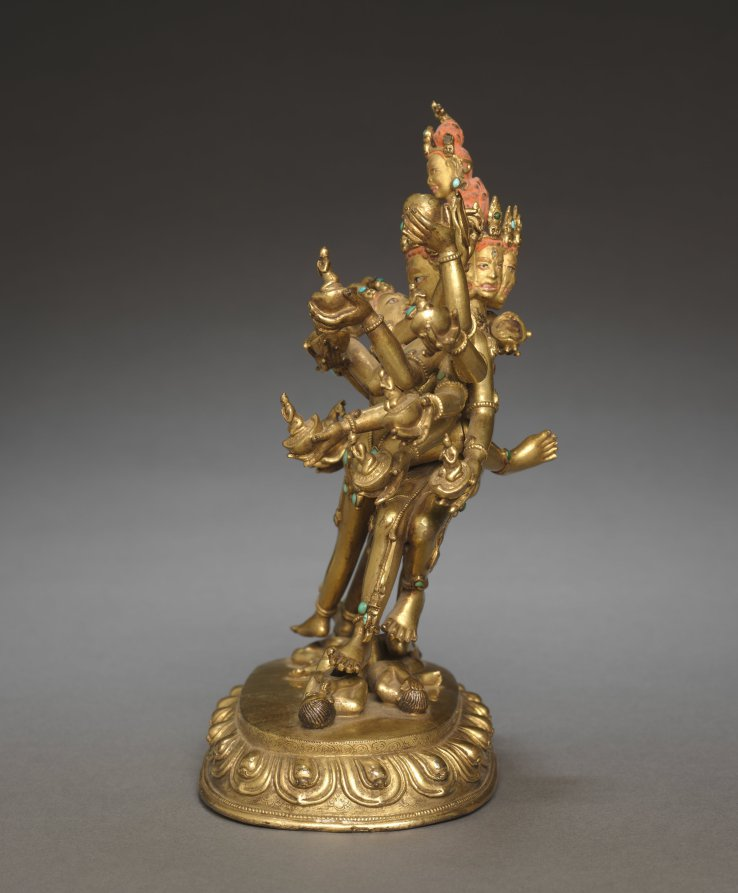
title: Hevajra and Consort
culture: Tibet, 17th century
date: 1600s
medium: gilt bronze inlaid with semiprecious stones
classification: Sculpture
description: The use of this piece in a ritual context would have indicated that practitioners were following the methods for reaching enlightenment set forth in the Hevajra Tantra text. Nairatmya, the female consort of Hevajra, appeared to the yogi Virupa (at left) in a vision and revealed to him the contents of the text, which was then passed down through a lineage of disciples. An emanation of Akshobhya, the Cosmic Buddha of the East, Hevajra holds a skull bowl in his 16 hands. The rear pair of Hevajra's four legs is shown in a dynamic dance posture, while his front two legs are in a lunge, trampling the miserable personifications of ignorance and the false sense of ego. Also trampling them is the left foot of his consort Nairatmya, who has her other leg wrapped around his waist. The figures are explicitly shown in sexual union, indicative of the bliss that comes from conquering all impediments to enlightenment.